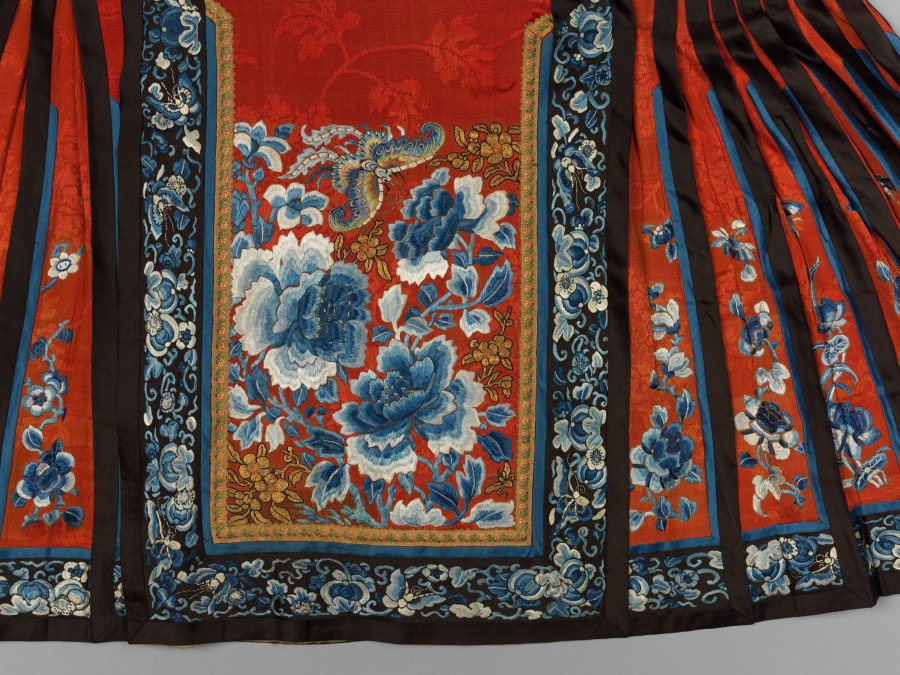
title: Skirt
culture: China, Qing dynasty (1644-1911)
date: 1800s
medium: Silk and gold thread: embroidery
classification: Garment